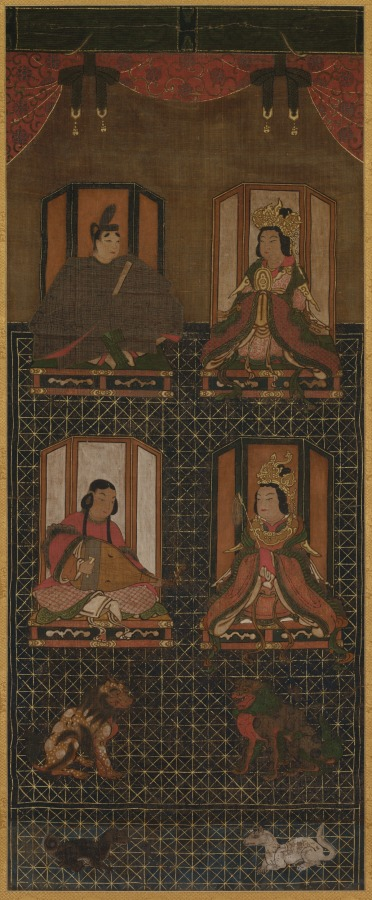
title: Mandala of the Four Deities of Mt. Kōya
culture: Japan, Muromachi period (1392–1573)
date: 1500s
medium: hanging scroll, ink, color and cut gold foil on silk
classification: Painting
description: The two kami, or deities, at the top of this painting are Kariba Myōjin and Niu Myōjin. They inhabit Mount Kōya and are described as son and mother. They are shown here as courtiers, with Kariba in Japanese-style court robes and Niu in robes modeled after court garments of the Tang dynasty. The two kami seated beneath are Kehi Myōjin, portrayed as a lady holding a whisk, and the youthful Miyajima Myōjin, with his hair drawn up in loops, playing a lute (biwa). Hōjō Masako (1157–1225), the wife of the first Kamakura shogun (leader) Minamoto Yoritomo (1147–1199), invited them to Mount Kōya.